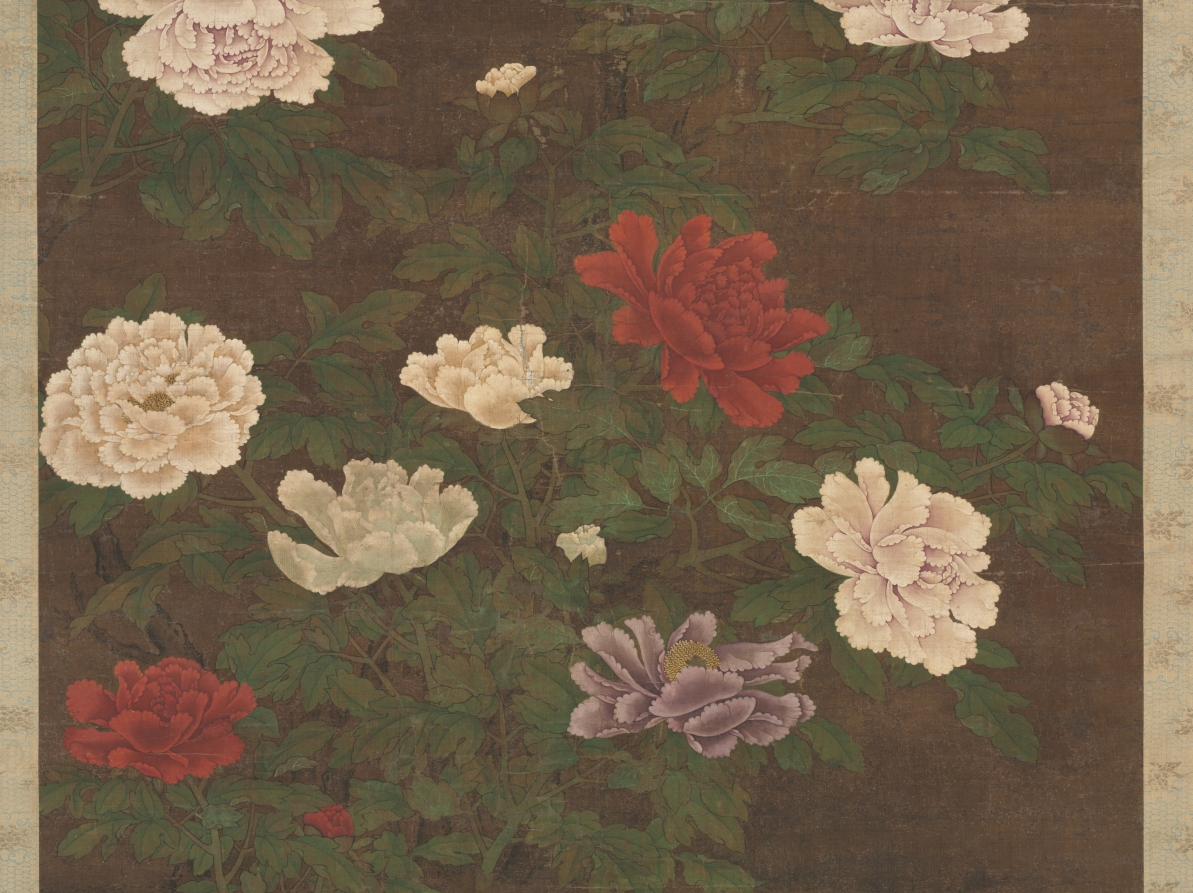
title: Peonies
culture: China, Yuan dynasty (1271-1368)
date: late 1200s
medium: hanging scroll, ink and color on silk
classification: Painting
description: In China, the peony is considered the Queen of Flowers, representing the late spring season. The shrubs of this tree peony are in full bloom, blossoming in various colors. Peony paintings were popular from the Southern Song period to the Ming dynasty. The large scale of this decorative scroll suggests that it may have been hung in a reception hall, conveying good wishes for wealth and prosperity.